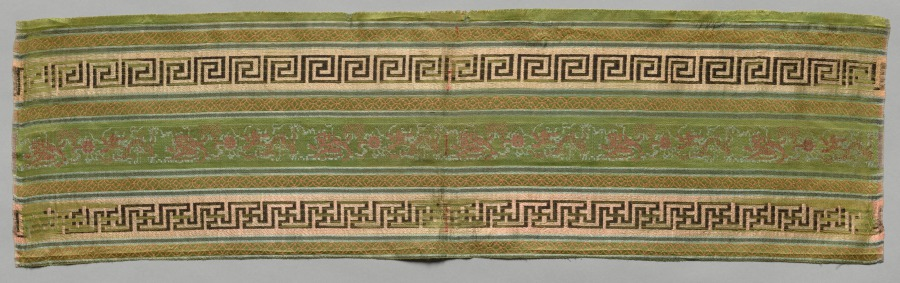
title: Fragment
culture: China, 19th century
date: 1800s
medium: silk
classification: Textile